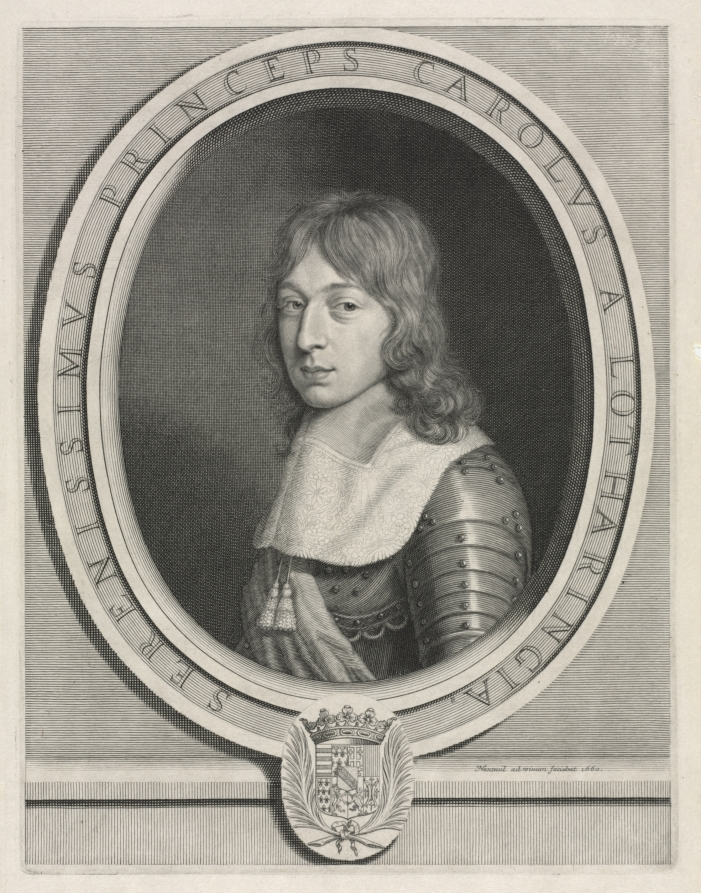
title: Charles V, Duke of Lorrain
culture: France, 17th century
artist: Robert Nanteuil (French, 1623–1678)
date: 1660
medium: engraving and etching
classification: Print